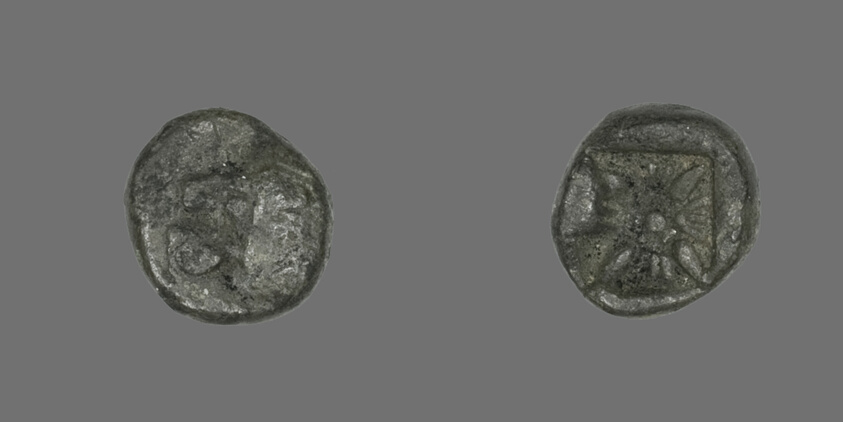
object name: Coin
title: Diobol (Coin) Depicting a Lion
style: greek, ancient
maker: Greek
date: 395-377 BCE or 478 BCE and later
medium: Silver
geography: Ancient Greece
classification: coin; ancient art